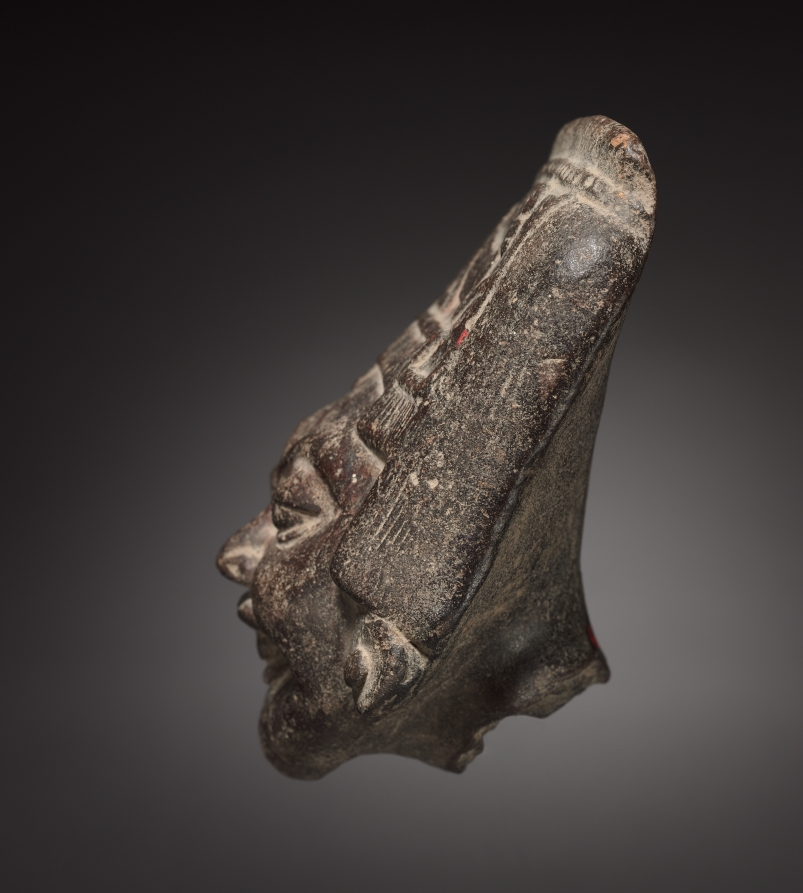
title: Head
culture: Mexico, Classic Veracruz (Remojados Culture)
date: 600–1100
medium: terracotta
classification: Sculpture